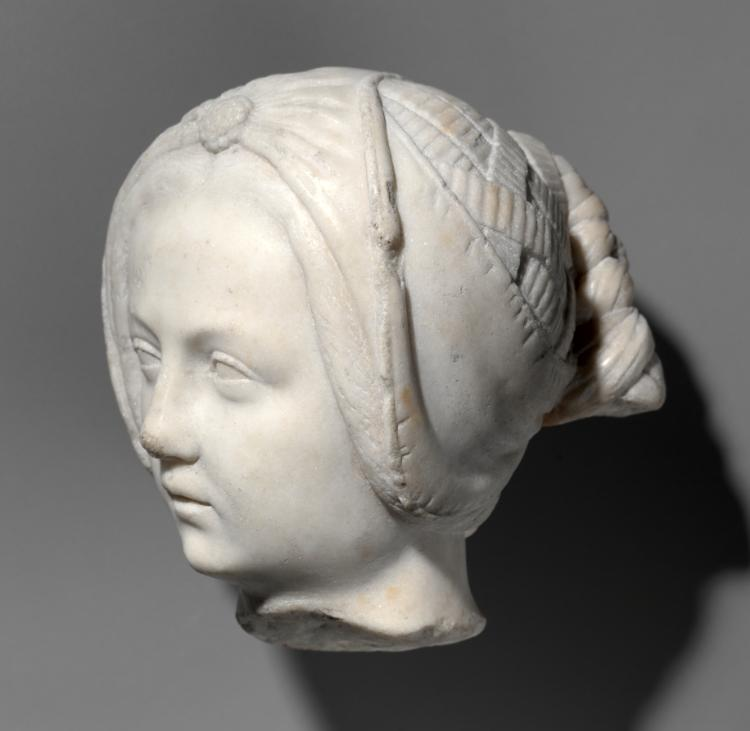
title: Head of a Man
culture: France, 15th century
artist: circle of Michel Colombe (French, c. 1430–c. 1513)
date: 1520–1525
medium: marble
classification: Sculpture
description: The original context and function of these two marble heads are unknown. They are presumed to have been part of a relief sculpture from a château, perhaps in the Loire region, or else from a tomb sculpture. Their style is reminiscent of sculptures produced by Michel Colombe, a prominent sculptor active in the Loire Valley in the service of aristocratic and royal patrons, and may have been carved by a close follower or member of his workshop.